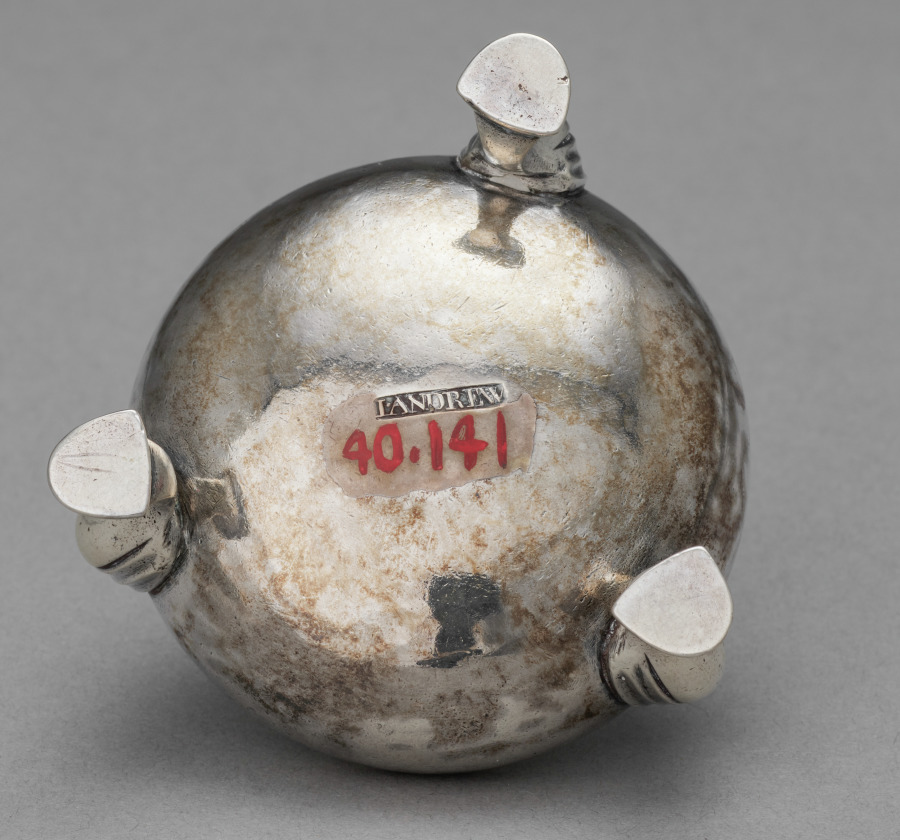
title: Salt Cellar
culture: America, Massachusetts, Salem, 18th century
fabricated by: John Andrew (American, 1747–1791)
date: c. 1770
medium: silver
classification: Silver